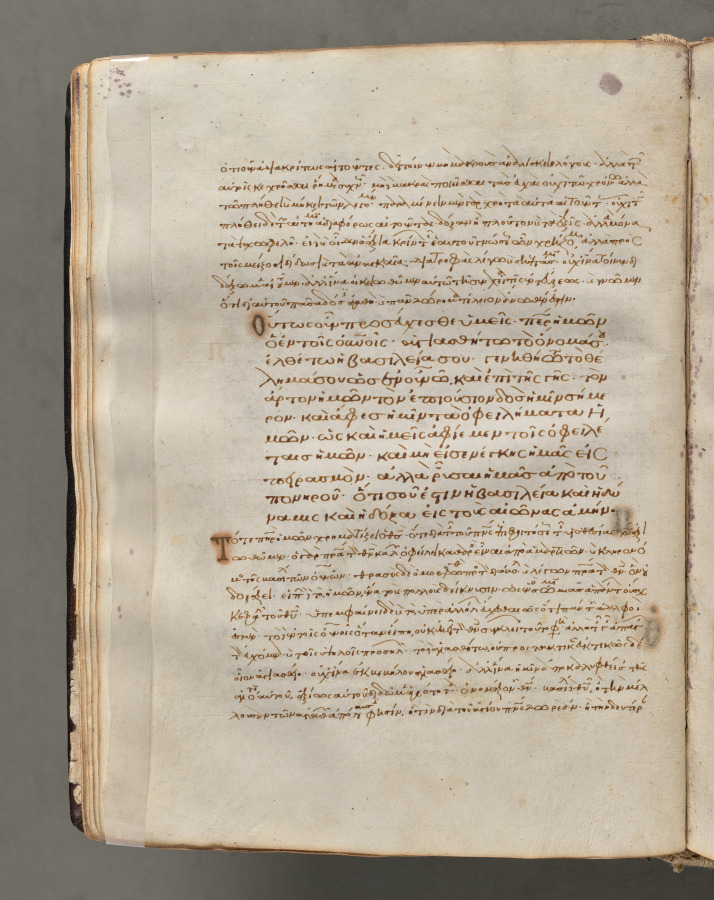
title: Text, folio 25 (verso), from a Gospel Book with Commentaries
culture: Byzantium, Constantinople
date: c. 1000–1100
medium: ink, tempera, and gold on vellum; leather binding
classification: Bound Volume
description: Each of the four gospels in this book opens on a page with brilliantly illuminated borders depicting the author of the text as well as birds—principally peacocks, symbols of the immortality of the soul—and fountains, representing the fountain of life and the salvation of the soul. This volume consists of 428 leaves with texts in Greek. Its level of sophistication suggests that it was probably written and decorated in a monastery in Constantinople.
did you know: Gospel books were carried in procession through Byzantine churches.